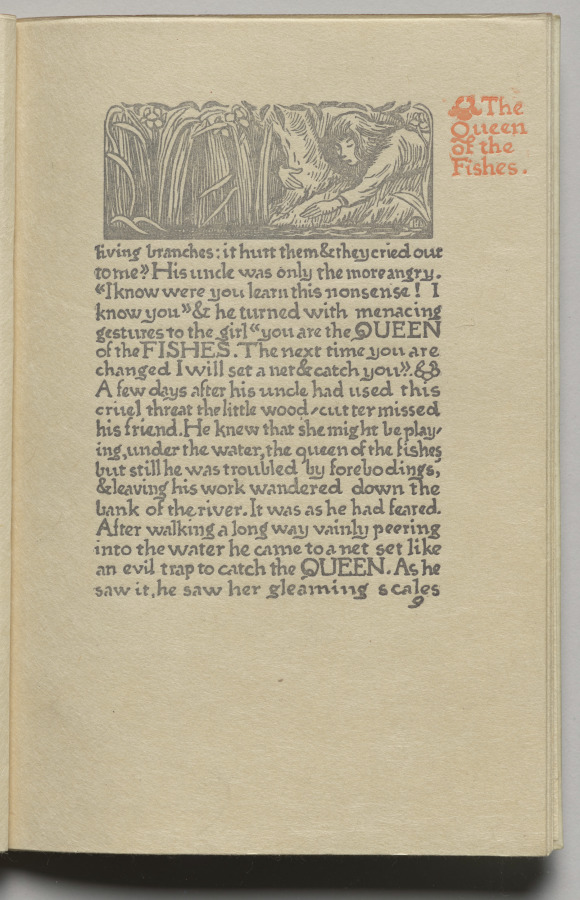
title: The Queen of the Fishes: Plate 9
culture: England, 19th century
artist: Lucien Pissarro (British, 1863–1944)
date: 1894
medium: woodcut printed in gray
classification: Bound Volume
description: Pissarro, son of the French Impressionist artist Camille Pissarro, moved to England in 1890. By 1894 he and his wife, Esther Bensusan Pissarro, had bought a printing press and established the Eragny Press. Influenced by William Morris, they were involved in every step of the production process: designing, cutting the woodblocks, setting type, and printing. The first book published by Ergany Press, The Queen of the Fishes, is based on an old fairy tale in which a peasant boy and girl escape the hardships of their lives by fantasizing that they have been turned into a giant oak and a splendid fish, respectively.